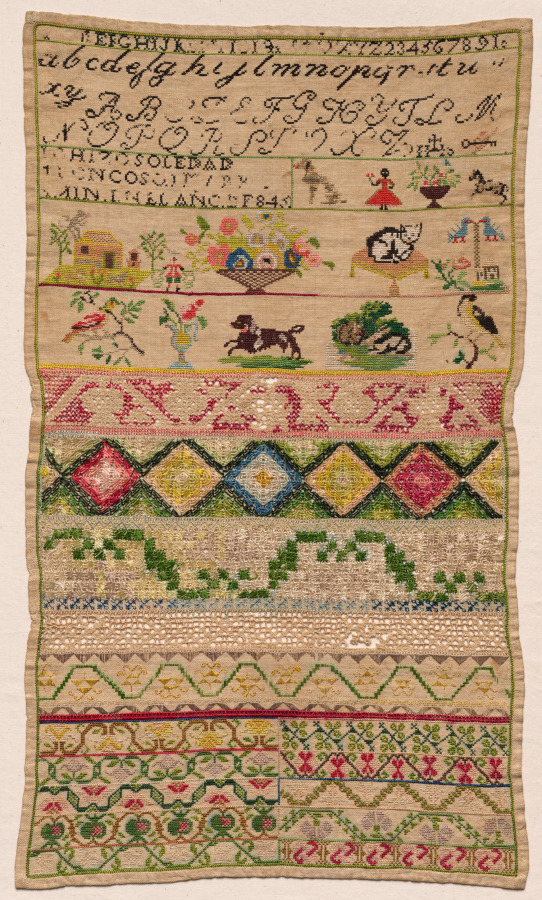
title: Long Sampler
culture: Mexico, 19th century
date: 1845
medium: embroidery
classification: Sampler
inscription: alphabet and inscription: "SO HIZO SOLEDAD / TIONCOSO / EN EL AÑO DE 845."